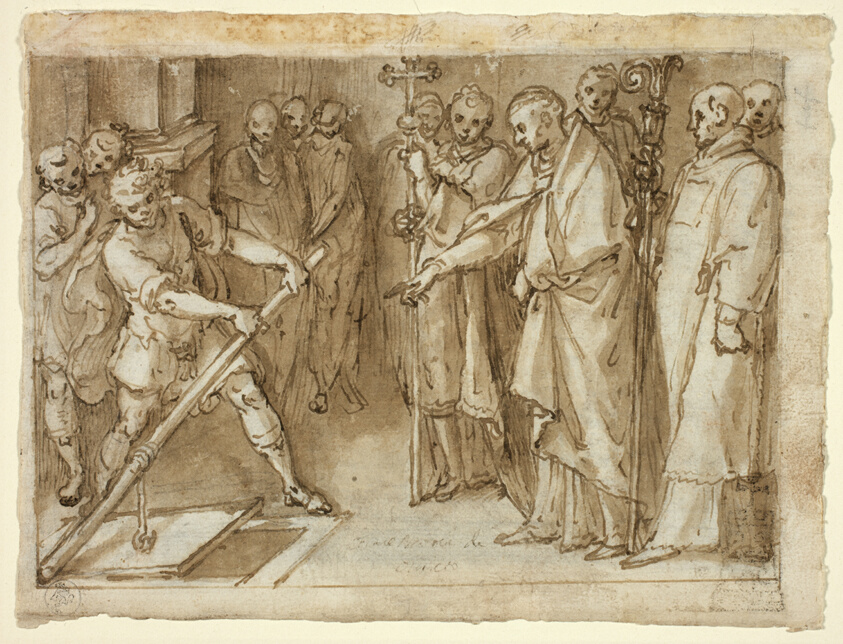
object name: Drawing and Watercolor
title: Saint Charles Borromeo Supervising the Opening of a Crypt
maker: Cesare Nebbia (Italian, 1536–1614)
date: c. 1604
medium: Pen and brown ink, with brush and brown wash, over graphite, on cream laid paper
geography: Italy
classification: pen and ink drawings; brush and ink; brush and wash; drawings (visual works); paper; prints and drawing; gouache; graphite